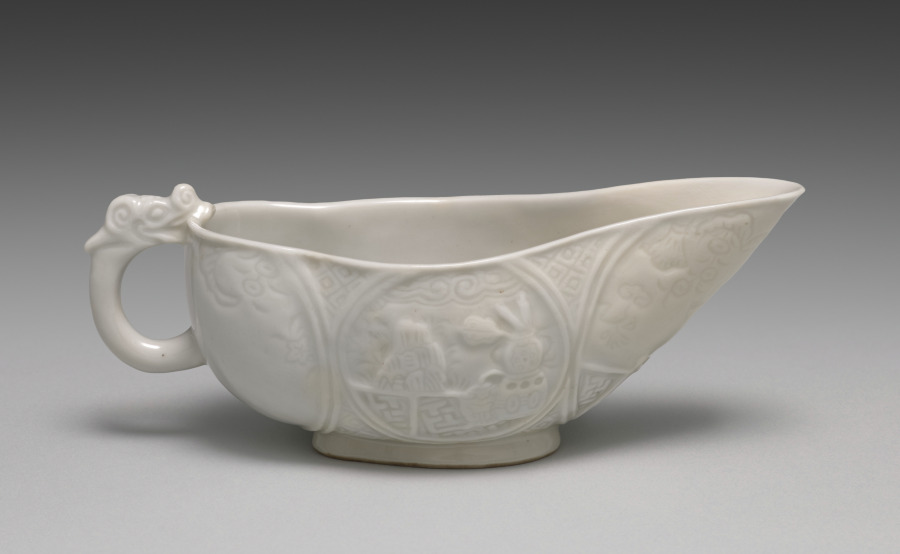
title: Water Cooler with Chinese Gardens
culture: Japan, Meiji period (1868–1912)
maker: Seifū Yohei III (Japanese, 1851–1914)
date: 1893–97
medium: Porcelain with molded and carved designs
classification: Ceramic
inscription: Artist's seal beneath the handle.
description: Unlike most pieces by the Seifu Yohei studio, this one bears a seal beneath the handle rather than on the base. The glaze and technique are identified on the box as taihakuji, or “great white porcelain,” an important early invention Yohei III devised in 1872 that involved the combination of a distinctive translucent, creamy glaze over an ivory-colored clay body. The body’s two sides have garden scenes seen through windows. Designs of flowers and butterflies are incised in the spaces at both ends. The garden on the right-hand side of the vessel, seen through a round window, has a decorative rock with grasses beneath a cloudy sky; and on a tiled veranda, there is a teapot as well as a fan and two scrolls inserted into a double-handled urn or kettle atop a brazier. The garden on the left-hand side has two enormous flowers below what may be either a cloud or a rippling pond; a garden rock—or perhaps a carved wood sculpture—with a circular perforation sits on what appears to be a veranda. While the details may be open to interpretation, the setting is a rather glamorous Chinese residence or palace with a superbly tended garden in spring or summer.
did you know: This water cooler has a handle with a dragon head.